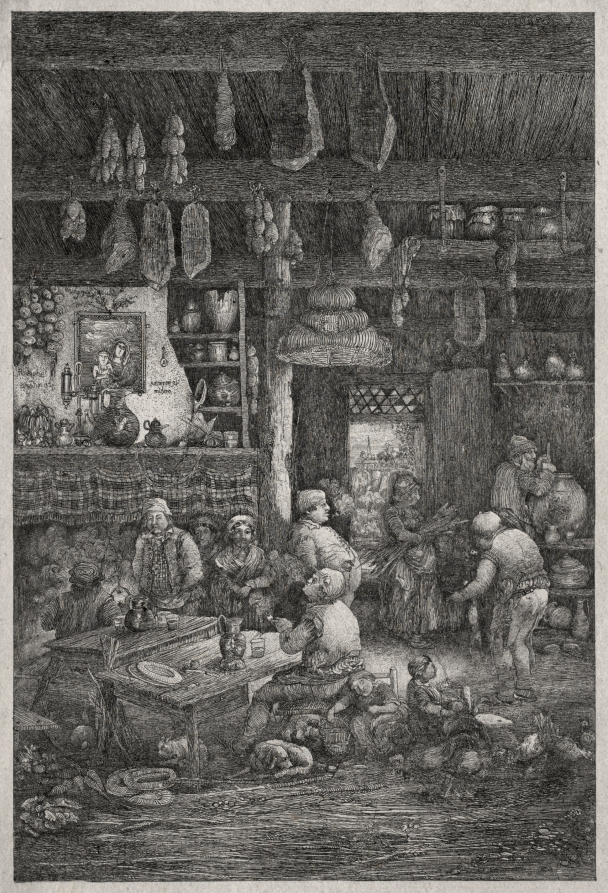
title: Moldavian Interior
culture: France, 19th century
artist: Rodolphe Bresdin (French, 1822–1885)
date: 1856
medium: lithograph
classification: Print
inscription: left, in stone: Rodphe [sic] Bresdin 1859 siempre el mismo (in image)